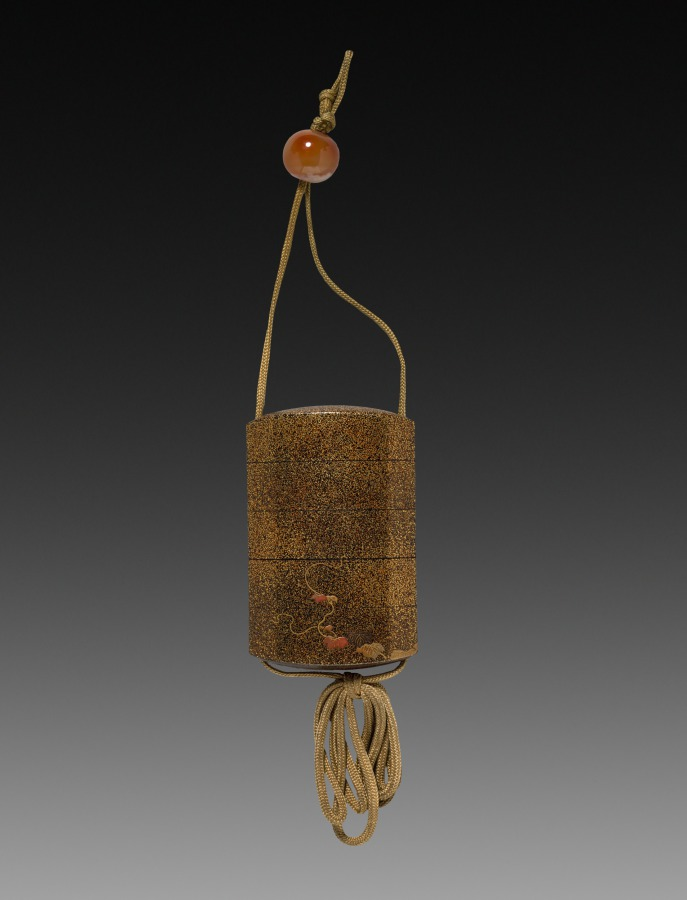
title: Inro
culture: Japan, Edo period (1615–1868)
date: c. 1785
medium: lacquer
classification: Lacquer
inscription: Signature: Toju, aged 78 years